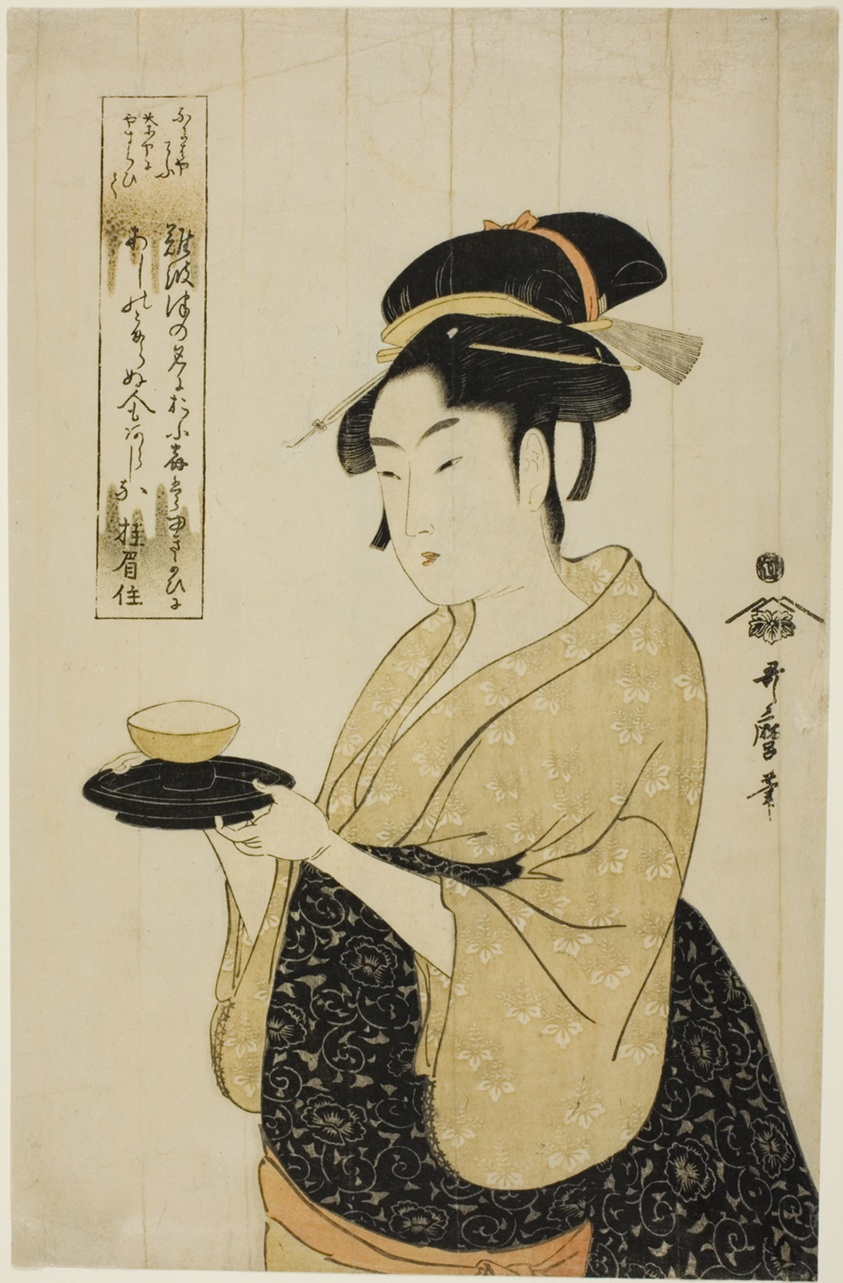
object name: Print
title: Naniwaya Okita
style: Japanese (culture or style)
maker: Kitagawa Utamaro 喜多川 歌麿; Japanese, 1753 (?)-1806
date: c. 1793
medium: Color woodblock print; oban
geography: Japan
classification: woodblock print; print; asian art